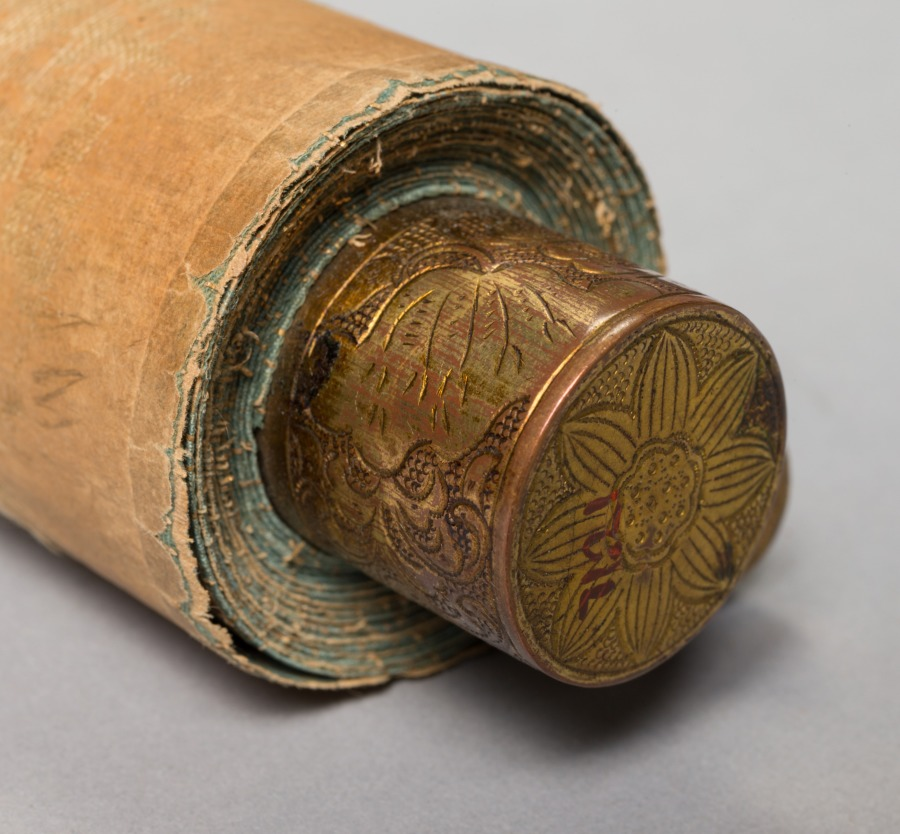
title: Monju with Five Hair Knots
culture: Japan, Kamakura period (1185–1333)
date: late 1200s–early 1300s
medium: Hanging scroll; ink, color, gold, and cut gold on silk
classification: Painting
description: This Buddhist painting shows Monju, Manjushri in Sanskrit, riding a lion. Monju is a bodhisattva, a being who, though enlightened, chooses not to become a Buddha but instead helps others achieve enlightenment. Monju’s youthfulness symbolizes his pure wisdom, unsullied by the world, and his five hair knots represent his vow to keep calamity at bay. The supernatural nature of his lion is emphasized by its hair, every strand painted in gold, as well as by the lotus platforms beneath each of its feet. The boy’s bejeweled body and silk finery is meant to resemble that of an Indian prince.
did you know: This painting is exemplary of the Kamakura period, known for artworks with special attention paid to the realism of images.